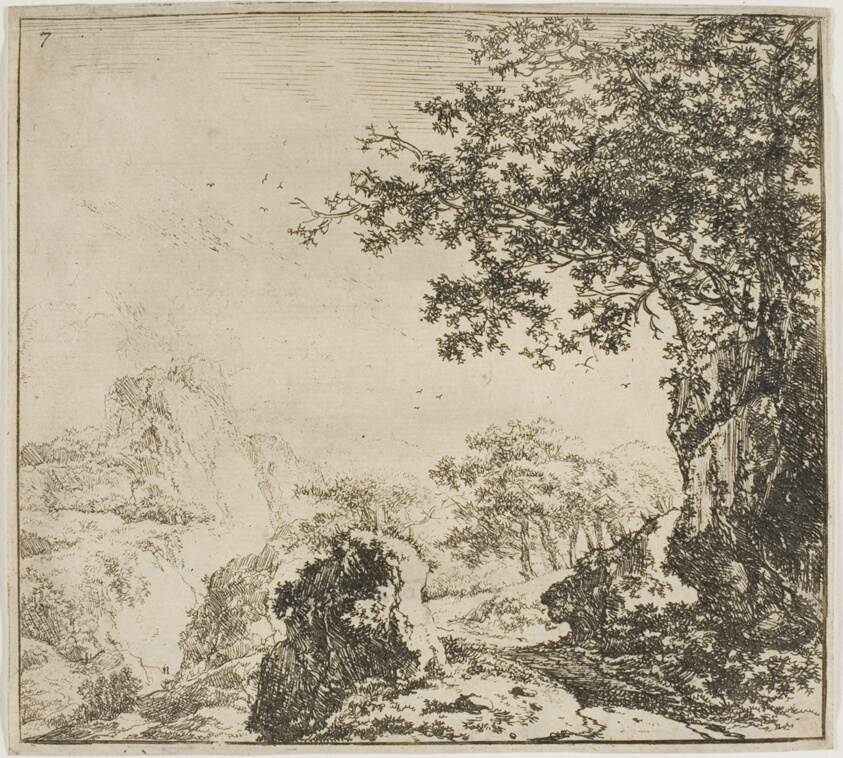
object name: Print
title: Mountainous Landscape with a Road, from the series Set of Landscapes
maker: Herman Naijwincx (Dutch, 1624-1651)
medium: Etching on ivory paper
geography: Netherlands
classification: etching; print; prints and drawing